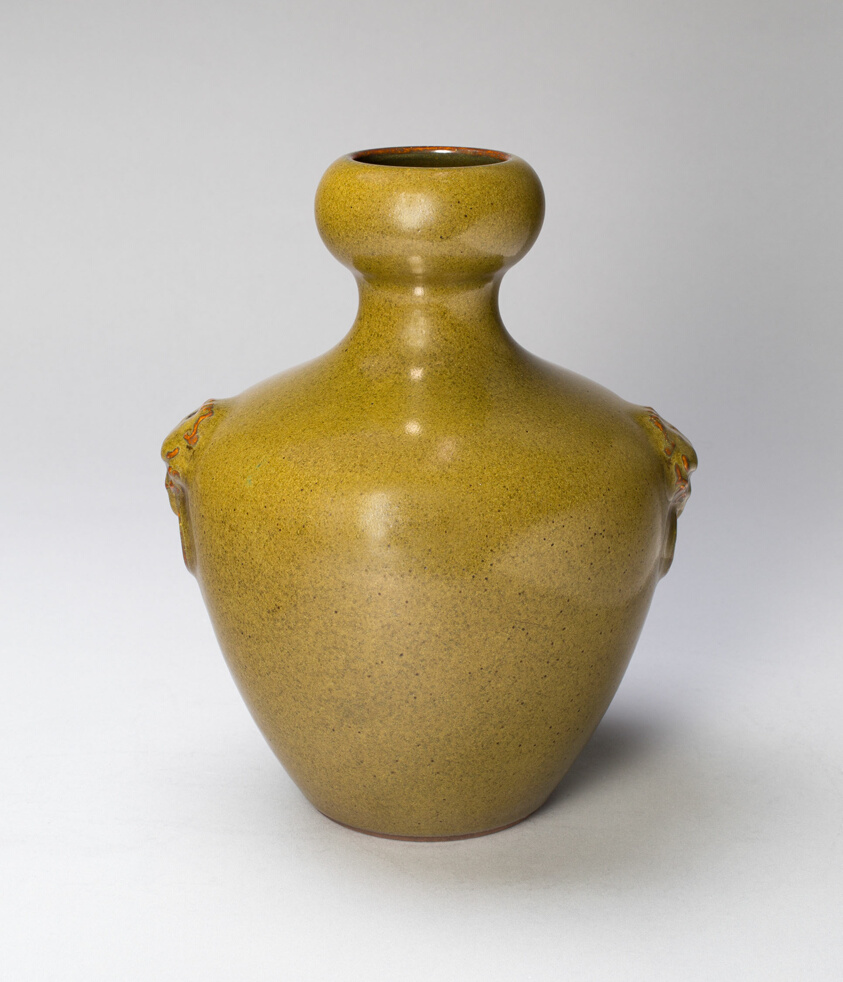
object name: Vessel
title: Vase with Animal Handles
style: Chinese (culture or style)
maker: China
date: Qing dynasty (1644–1911), Yongzheng reign mark and period (1723–35)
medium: Porcelain with tea dust glaze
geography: China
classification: vase; vessel; porcelain; asian art; ceramics